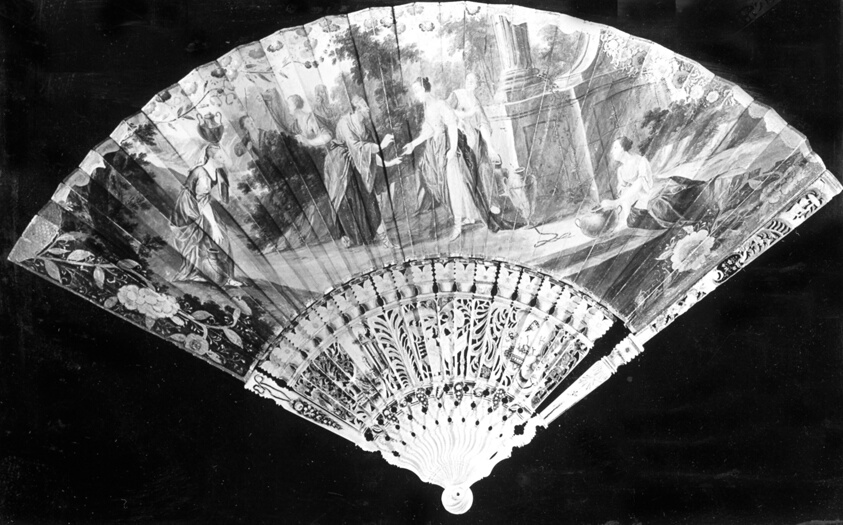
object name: Costume and Accessories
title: Fan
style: chinoiserie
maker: France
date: 1701/25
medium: Carved and painted pearl ivory sticks and guards; painted paper mount; pearl rivet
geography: France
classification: textile; fan - paper; costume accessory - folding fan; costume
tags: religious scenes